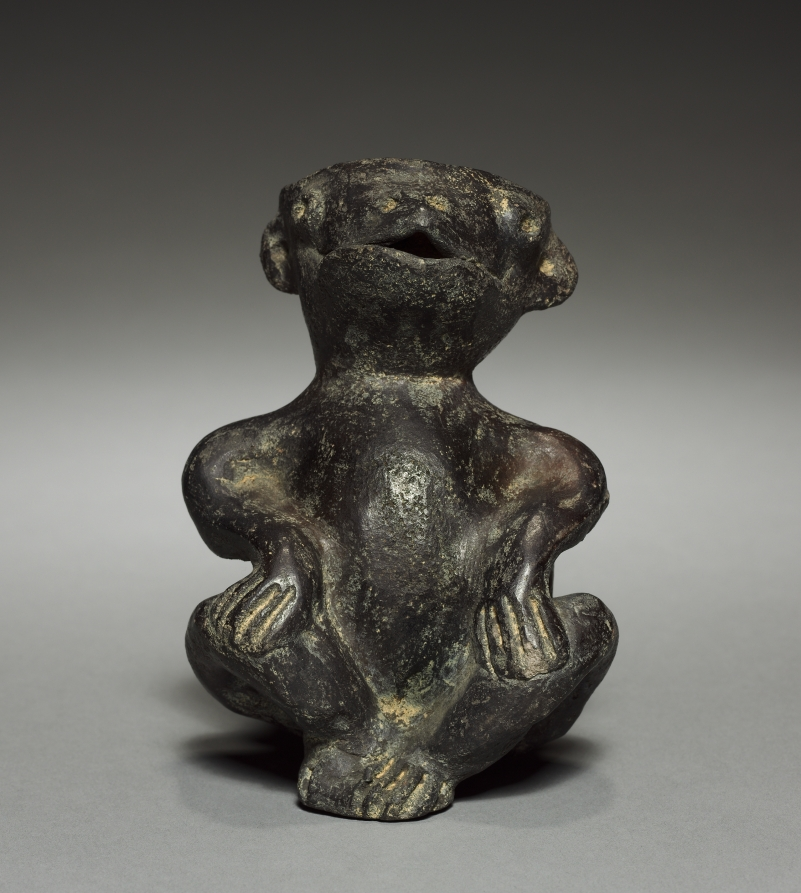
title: Seated Figure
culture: Colombia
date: before 1921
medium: pottery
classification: Ceramic